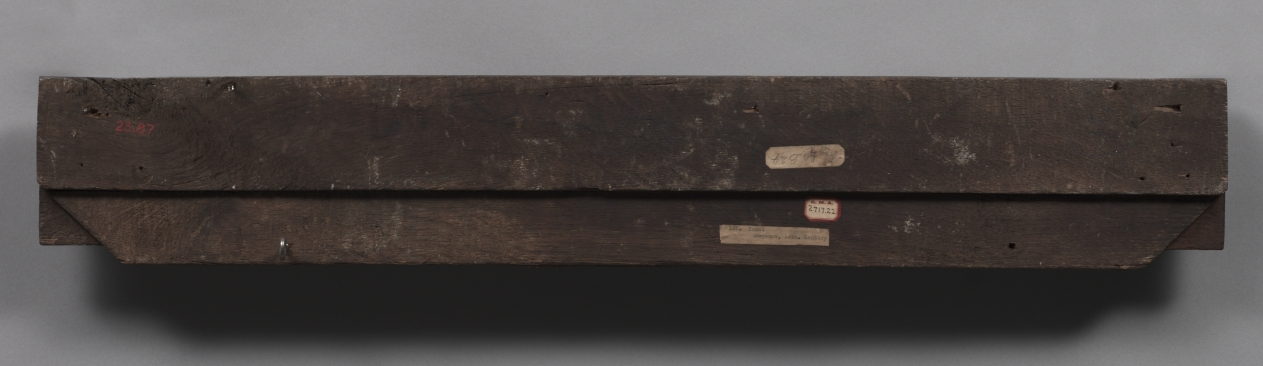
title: Panel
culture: France, Regency Period, 18th Century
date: 1715–1723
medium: wood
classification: Furniture and woodwork